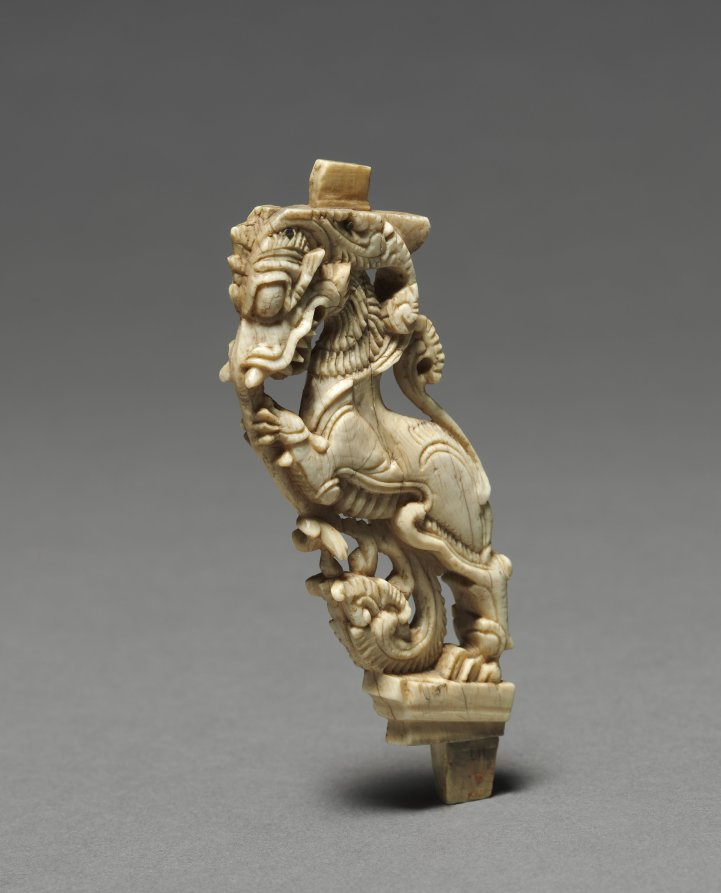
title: Carved Bracket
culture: South India, probably Madurai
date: 1600s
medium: Ivory with traces of pigment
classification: Ivory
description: Composite creatures with the body of a lion, tusks and trunk of an elephant, and horns of an antelope are standard elements of medieval Indian architecture and furniture. Traces of pigment indicate that these ivory furniture facings were brightly painted.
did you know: These creatures stand for shakti, or creative energy.